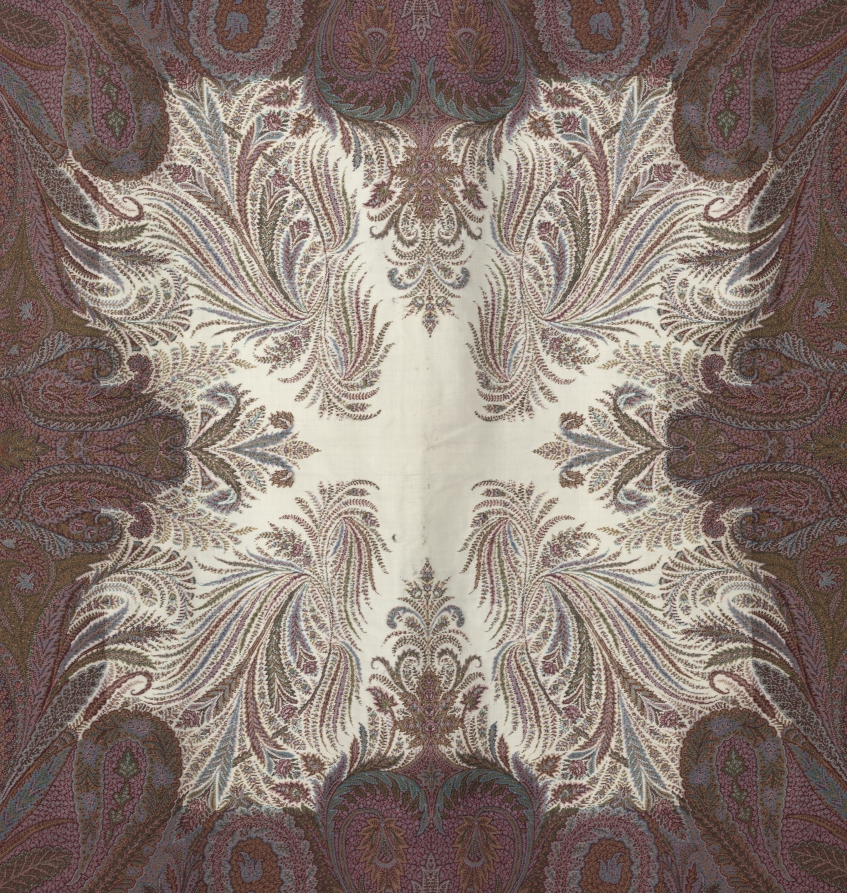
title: Square shawl with Quarter Shawl Layout and Ivory Center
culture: Austria, England, France, or Scotland, 19th century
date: 1848–51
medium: wool; 3/1 twill weave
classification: Textile